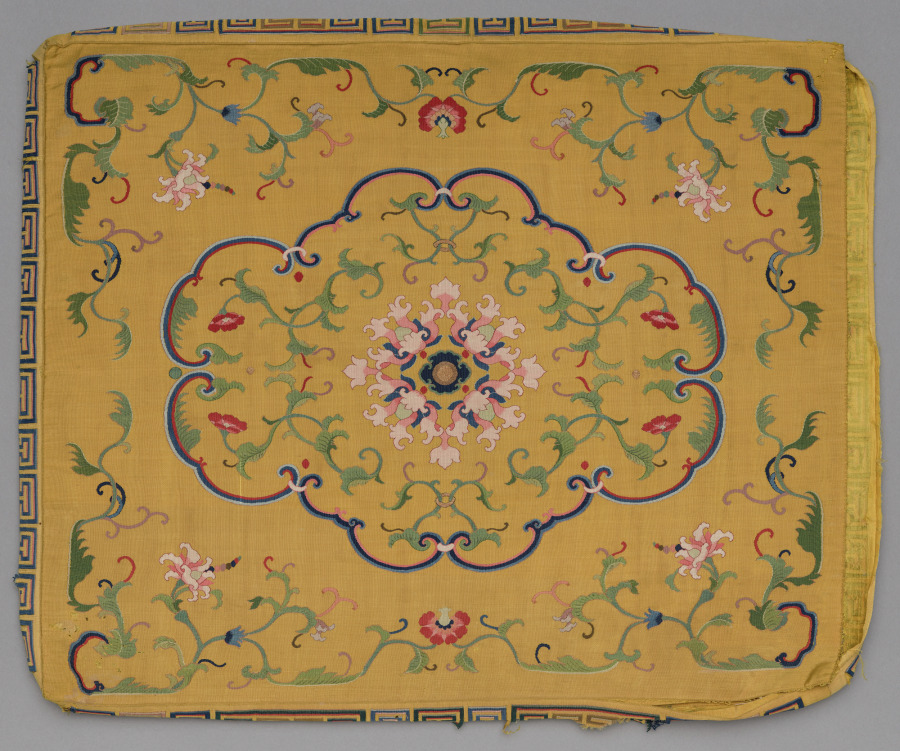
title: Cushion Cover (one of a set of four)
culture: China, Qing dynasty (1644-1911)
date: 1700s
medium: silk, metallic thread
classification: Textile